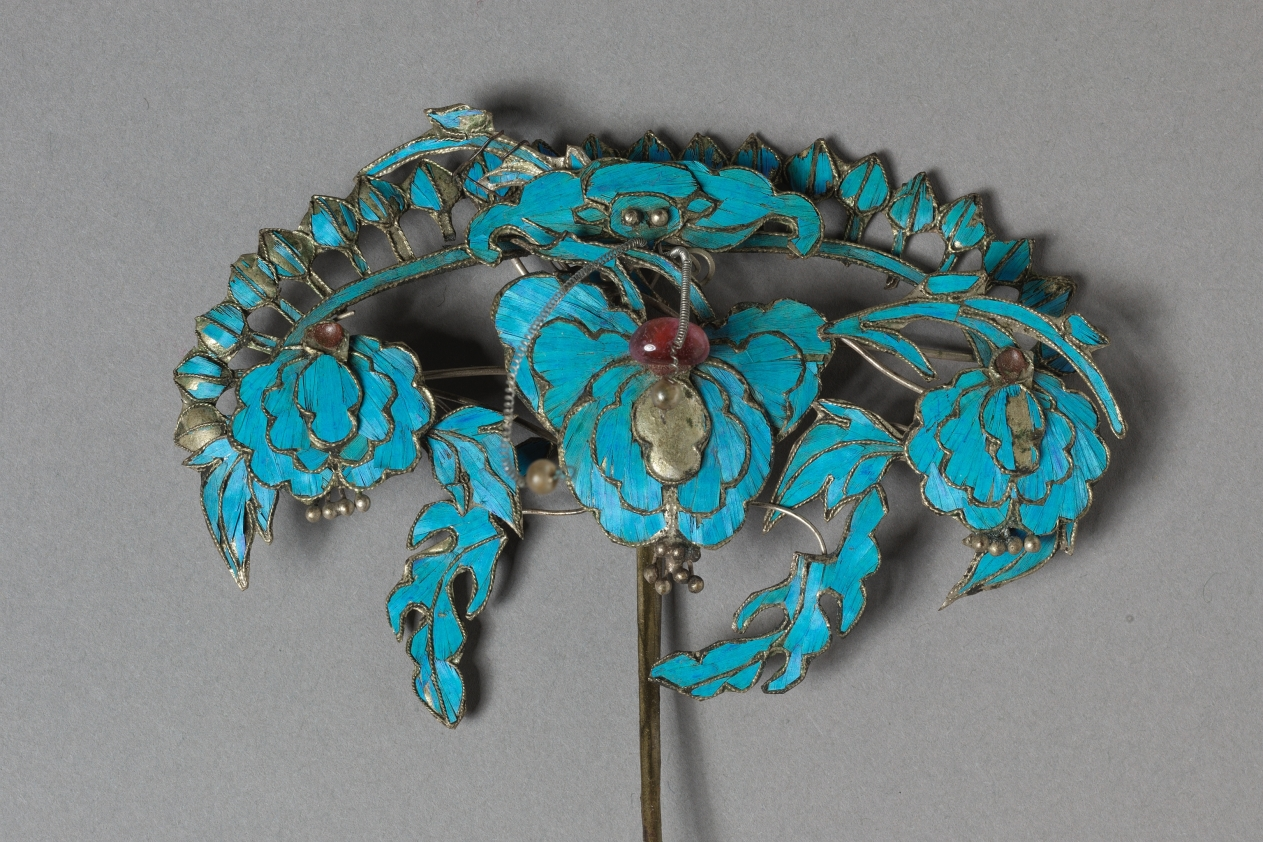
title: Headdress Ornament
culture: China, Qing dynasty (1644-1911)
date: 1800s–1900s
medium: Copper-silver alloy, gilding, kingfisher feathers, glass beads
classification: Jewelry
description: Hair ornaments depicting flowers, butterflies, or birds were worn by ladies of the Manchu elite class.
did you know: The iridescent blue feathers of kingfisher birds are inlaid in hairpins and headdresses.